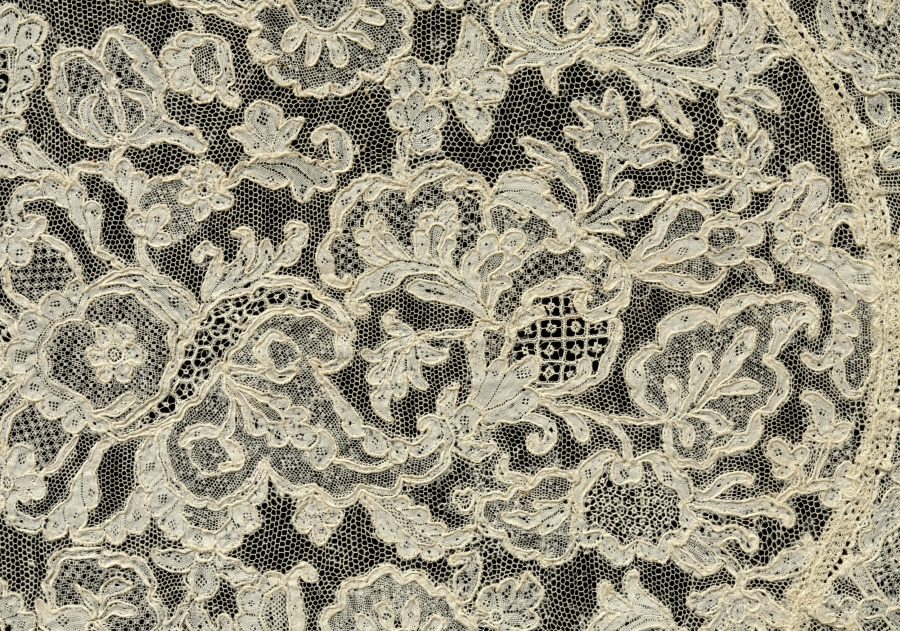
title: Garniture for Cap with Lappets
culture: France, Alençon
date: 1730s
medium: Linen: needle lace (Point d'Alençon)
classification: Lace